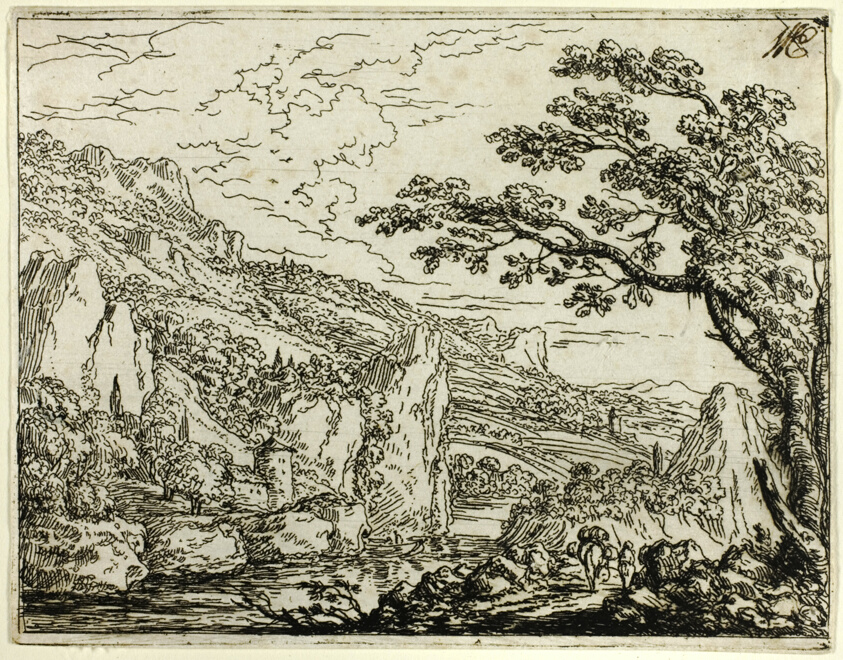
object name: Print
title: Italian Landscape with Ruins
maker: Jonas Umbach the Elder; German, 1624-1693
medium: Etching in black on ivory laid paper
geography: Germany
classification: etching; print; prints and drawing